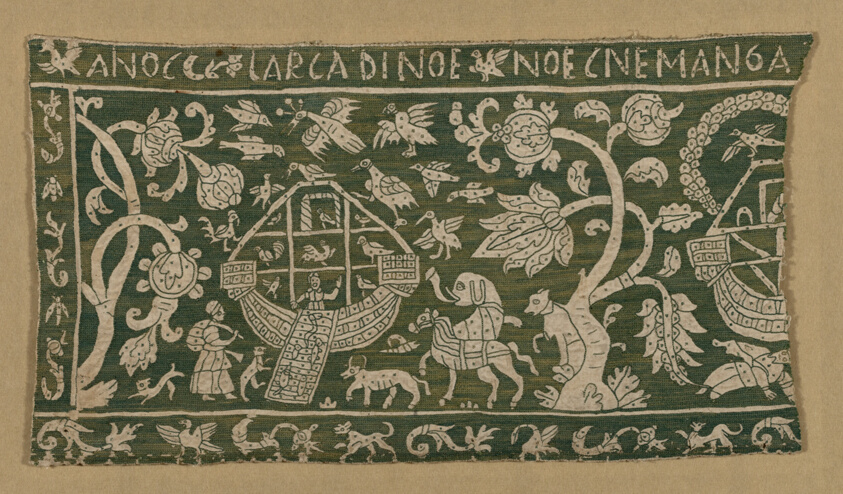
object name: Textile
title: Fragment (From a Border)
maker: Italy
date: 1575/1625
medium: Linen, plain weave; embroidered with silk floss in back, cross and long-armed cross stitches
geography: Italy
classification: textile; needlework (visual works)